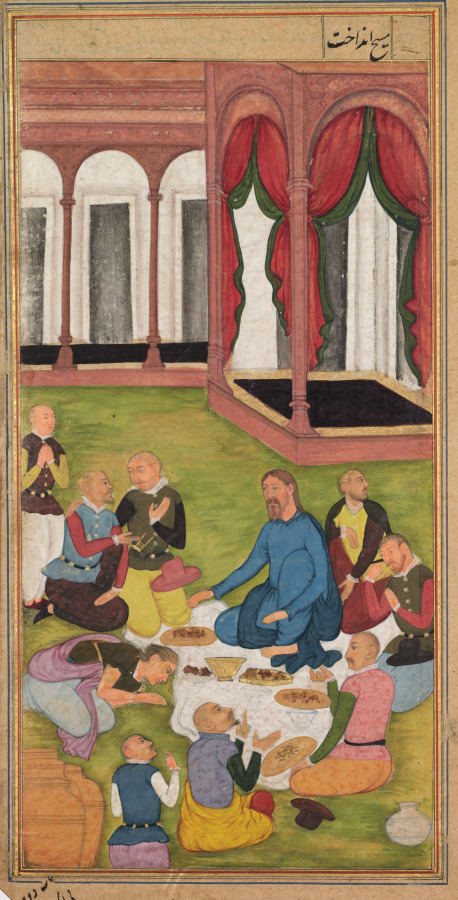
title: Mary Magdalene Presents Ointment to Jesus (folio 102 verso), from a Mirror of Holiness (Mir’at al-quds) of Father Jerome Xavier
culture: Mughal India, Allahabad, made for Prince Salim (1569–1627)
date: 1602–04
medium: Gum tempera, ink, color, and gold on paper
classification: Manuscript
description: While Jesus dined in the house of a Pharisee he was approached by Mary Magdalene, who threw herself to the ground and wept on Jesus’s feet with her tears. She then dried them with her hair and bathed them with expensive ointment. Her veil falls around her shoulders to reveal her hair’s disarray. Only Jesus appears to be calm as he extends his arms in a pacifying gesture; the other men point at their mouths and at each other, astonished at the dramatic behavior of this woman known to have been a prostitute. The plain black carpets and thin application of paint in some areas indicate that this painting was not finished.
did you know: Proportions of the portico and pavilion reveal some grasp of Renaissance ideals.